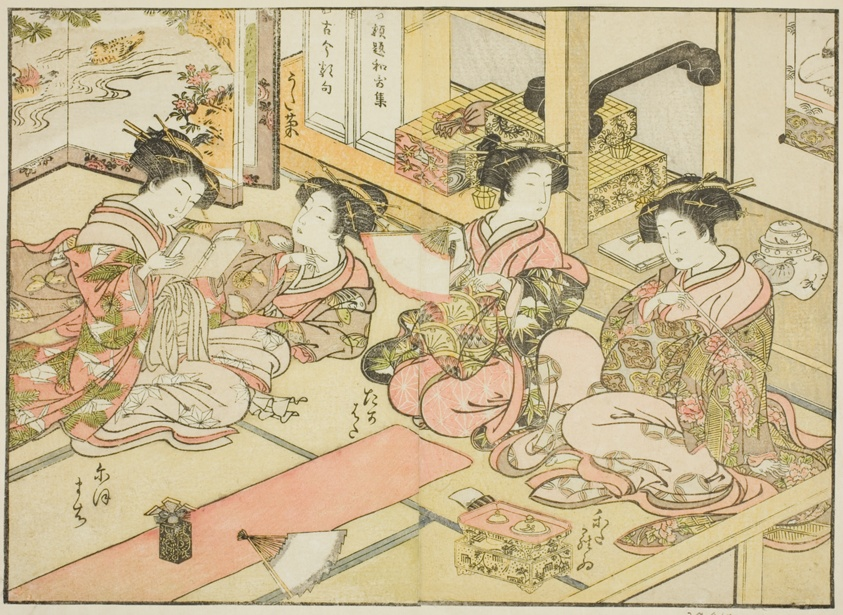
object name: Print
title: Courtesans of the Ogiya, from the book "Mirror of Beautiful Women of the Pleasure Quarters (Seiro bijin awase sugata kagami)," vol. 1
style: Japanese (culture or style)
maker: Katsukawa Shunsho; Japanese, 1726-1792; Kitao Shigemasa; Japanese, 1739-1820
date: 1776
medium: Color woodblock print; double-page illustration cut from a book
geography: Japan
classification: woodblock print; print; asian art